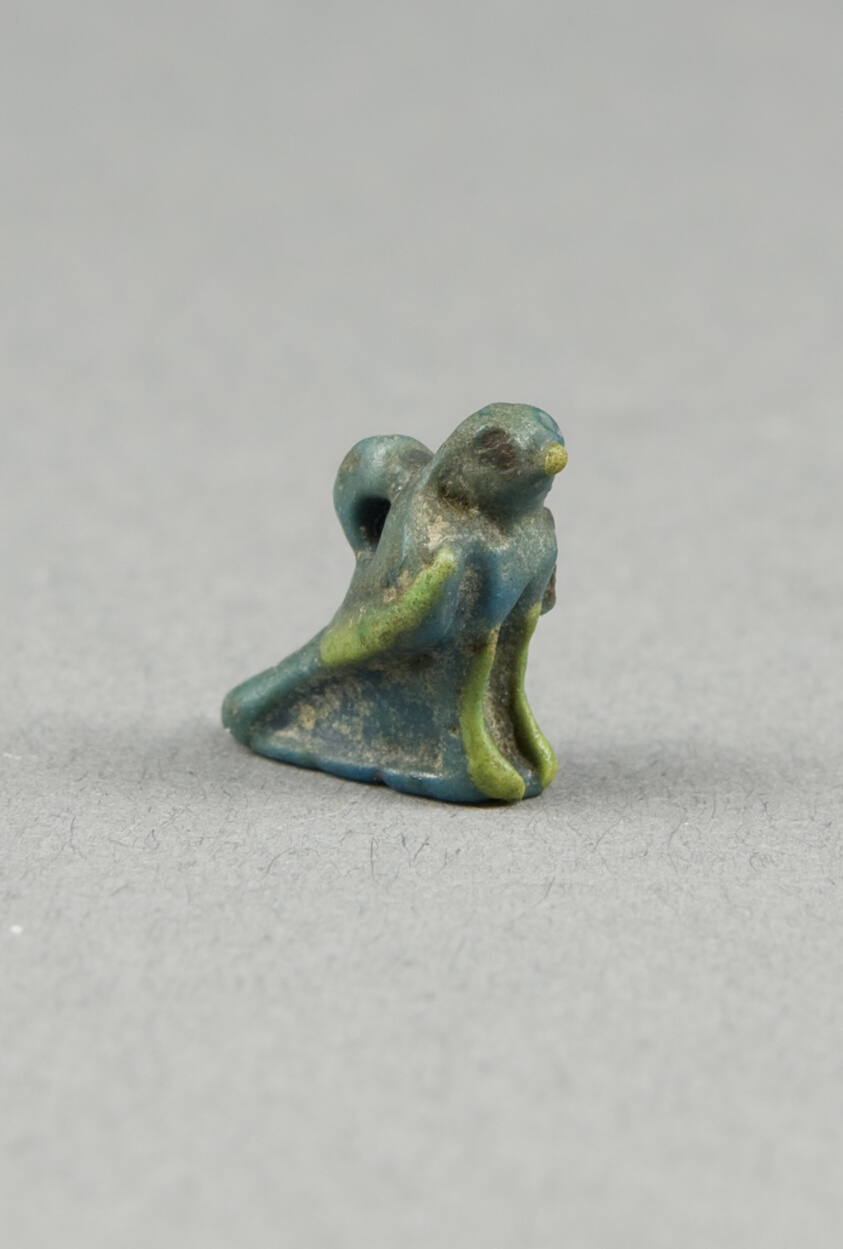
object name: Costume and Accessories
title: Amulet of a Hawk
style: roman period (egyptian), greco-roman (egyptian)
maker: Egyptian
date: Roman Period (?) (30 BCE–395 CE)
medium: Ceramic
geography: Egypt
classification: amulet; jewelry; ceramics; ancient art; costume